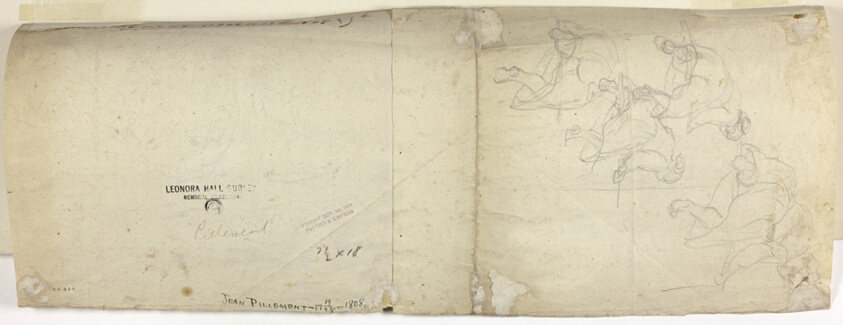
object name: Drawing and Watercolor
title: Two Horse Team with Driver, Pulling Carriage (recto); Sketches of Women Bending Over (verso)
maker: Attributed to David Teniers the Younger; Flemish, 1610-1690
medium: Graphite on ivory laid paper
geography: Belgium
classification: graphite; drawings (visual works); prints and drawing